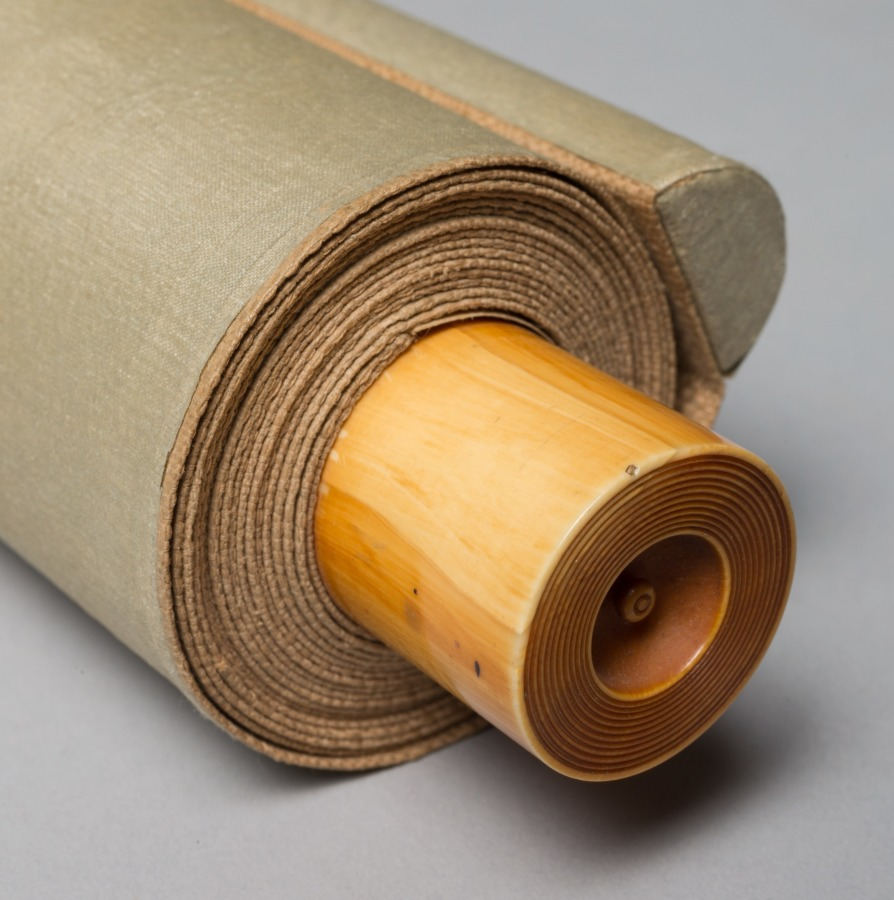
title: Summer Flowers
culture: Japan, Edo period (1615–1868)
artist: Kitagawa Sōsetsu (Japanese, active 1639–50)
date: mid-1600s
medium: hanging scroll; ink, color, and gold on paper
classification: Painting